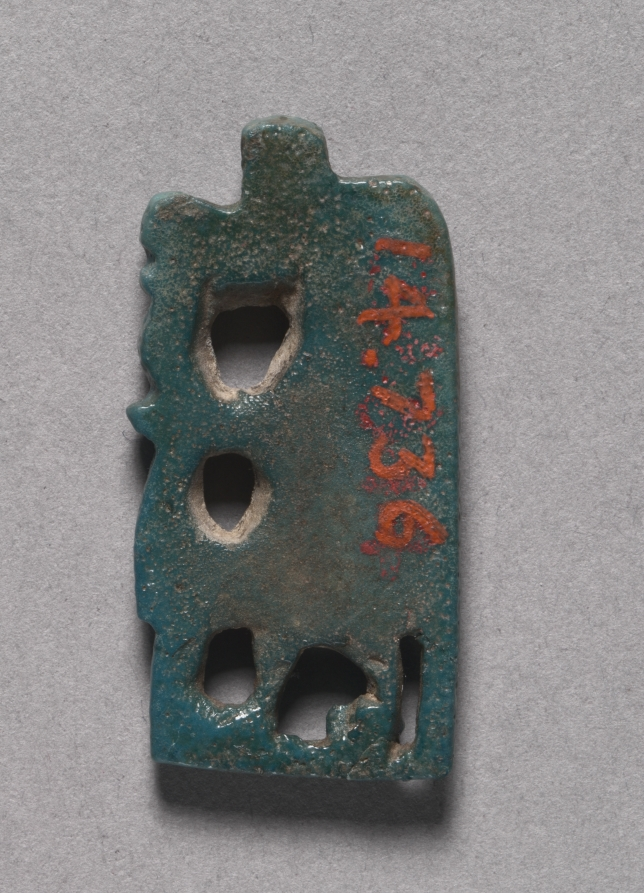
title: Amulet of Taweret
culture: Egypt, New Kingdom (1540–1069 BCE), Dynasty 18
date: 1540–1296 BCE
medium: deep turquoise green faience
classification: Amulets